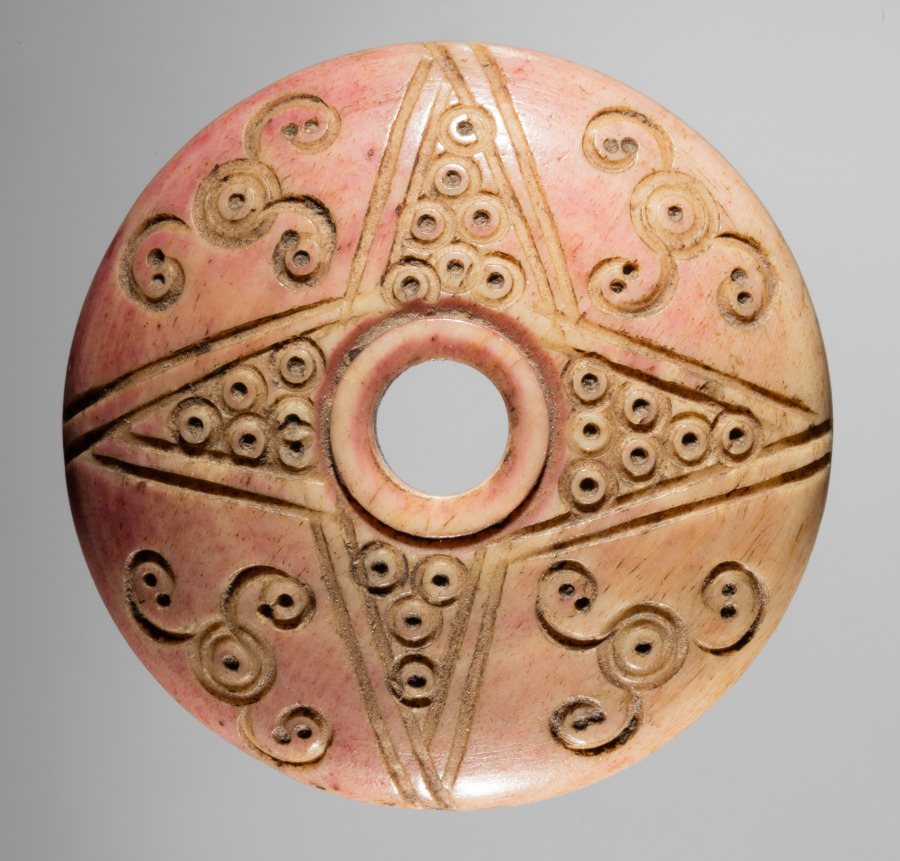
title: Spindle Whorl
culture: Iran, early Islamic period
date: 700s - 900s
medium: bone, incised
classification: Spindle Whorl